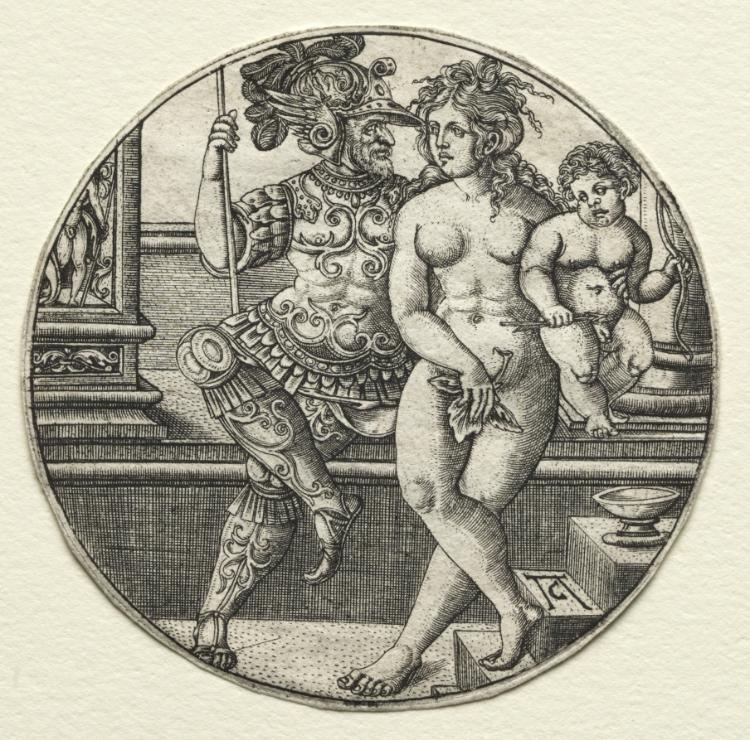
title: Mars, Venus, and Cupid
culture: Netherlands, 16th century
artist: Allaert Claesz. (Netherlandish, active c. 1520–26)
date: 1520s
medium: engraving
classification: Print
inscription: lower right, in plate: AC[in monogram] ; VERSO, left center, in graphite: C-2237 ; center, in grapite: 9-129-27